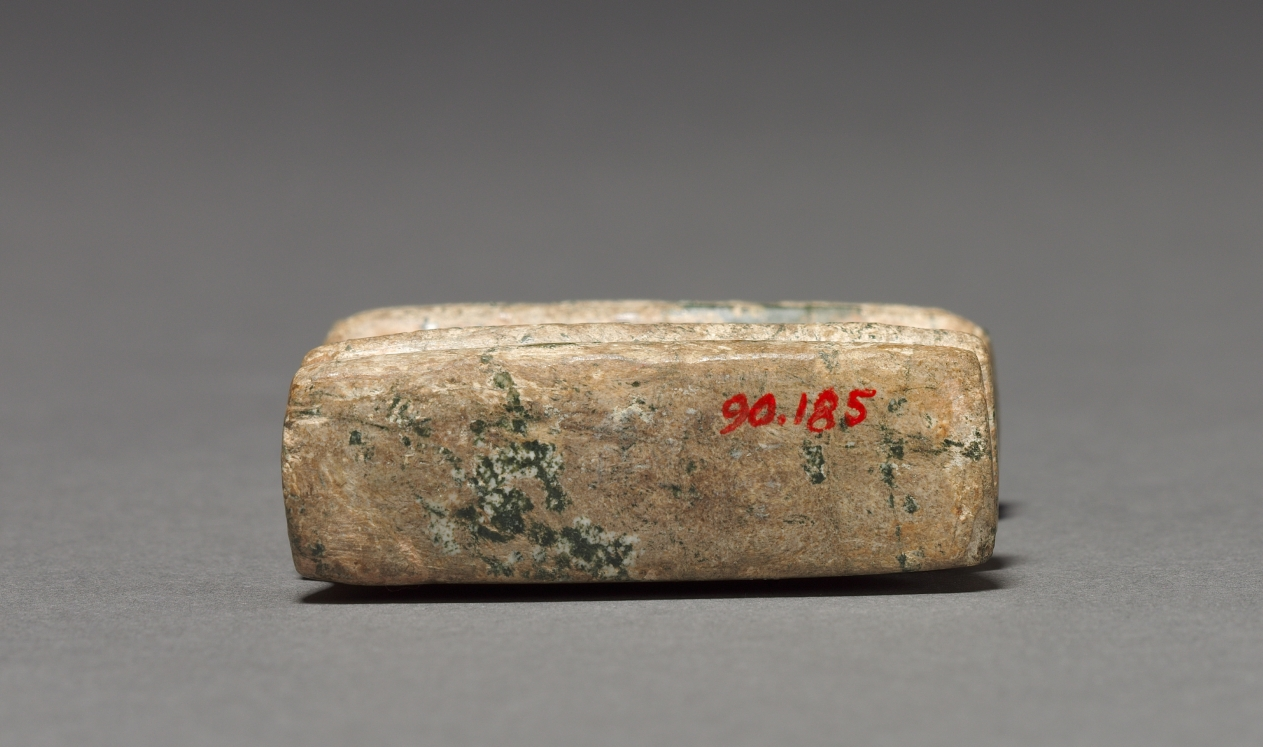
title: Architectural Model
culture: Mesoamerica, Mexico, Guerrero, Mezcala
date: 100 BCE–300 CE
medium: serpentine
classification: Sculpture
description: The Mezcala style takes its name from a river in its homeland, the Guerrero region of western Mexico. The style is known for small-scale stone sculptures including architectural “models” characterized by sleek abstraction. Because comparisons to actual architecture in the Mezcala region are scarce, it is not known whether the models refer to temples, houses, or underground funerary structures.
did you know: The Mezcala style was first recognized and defined in 1956.